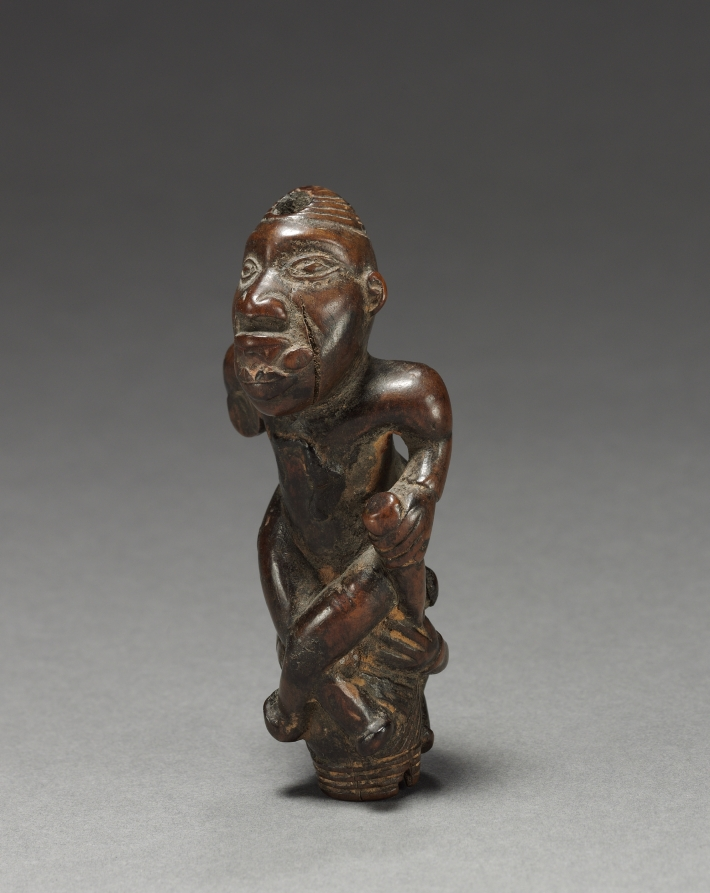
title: Male Figurine or Finial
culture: Central Africa, Democratic Republic of the Congo (most likely), Cabinda, or Republic of the Congo, probably Yombe people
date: early 1800s-early 1900s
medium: Wood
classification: Sculpture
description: This figurine or finial may have contained a medicine-filled package on its abdomen. The man seated with his legs crossed and wearing a coiffure of Portuguese inspiration may represent a chief, which was once attached to a scepter or perhaps a flywhisk. Beneath the chief, a child holds onto his back; though such imagery is more typically seen with female sculptures.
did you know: The stomach cavity was once filled with medicinal substances; once removed, the nkisi figure is considered “decommissioned.”